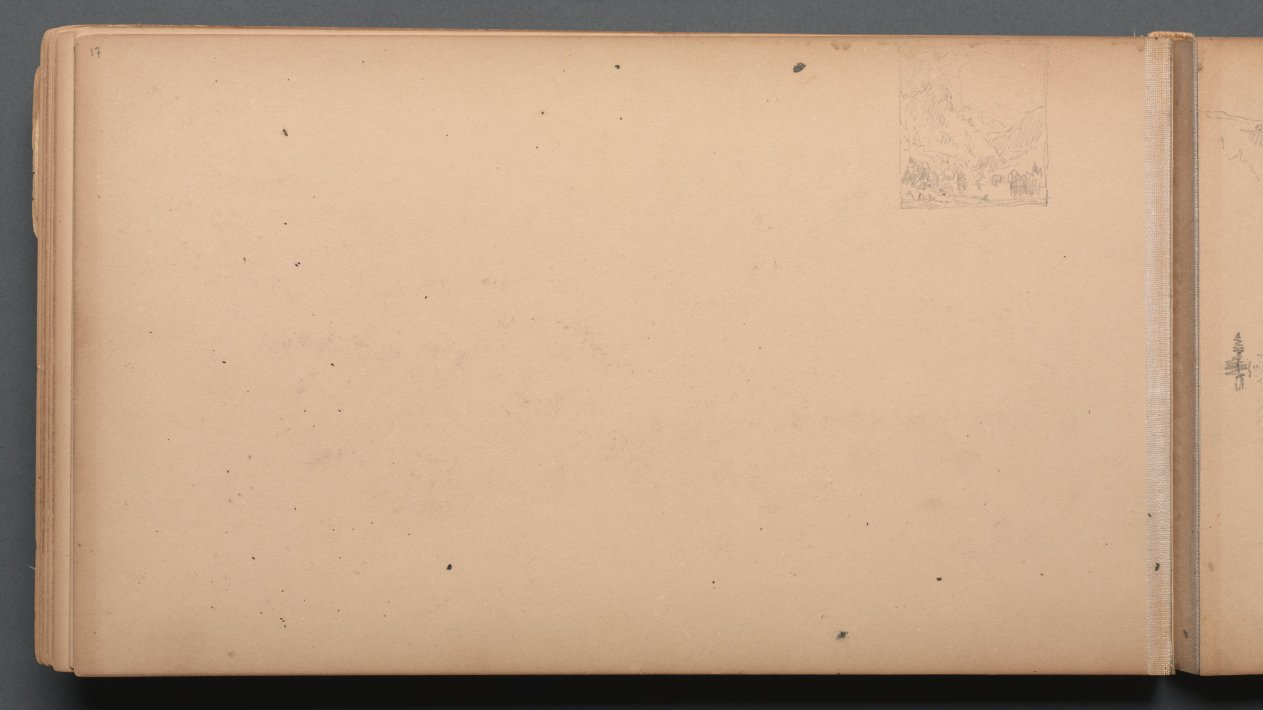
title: Sketchbook, page 17: Dixville Notch, Maine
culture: America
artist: Sanford Robinson Gifford (American, 1823–1880)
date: 1859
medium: graphite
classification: Bound Volume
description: Gifford was an American landscape painter belonging to the second generation of Hudson River school artists. Based in New York City with a studio at the Tenth Street Studio Building, Gifford took annual summer trips to the Catskills, the Adirondacks, and other scenic locations in New England. This sketchbook accompanied the artist on his expedition in 1859 to New Hampshire and Maine, where he drew sites such as Dixville Notch, the White Mountains, and Peaks Island, Casco Bay. Gifford used such graphite studies as the basis for oil paintings worked up in his studio, such as A Home in the Wilderness (1866).